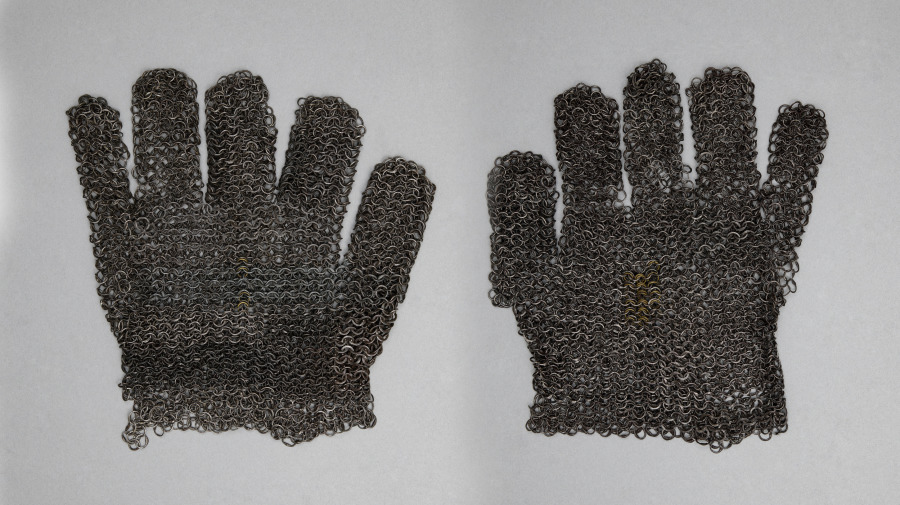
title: Pair of Gauntlets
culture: Europe, 15th century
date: 1500s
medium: chain mail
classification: Arms and Armor